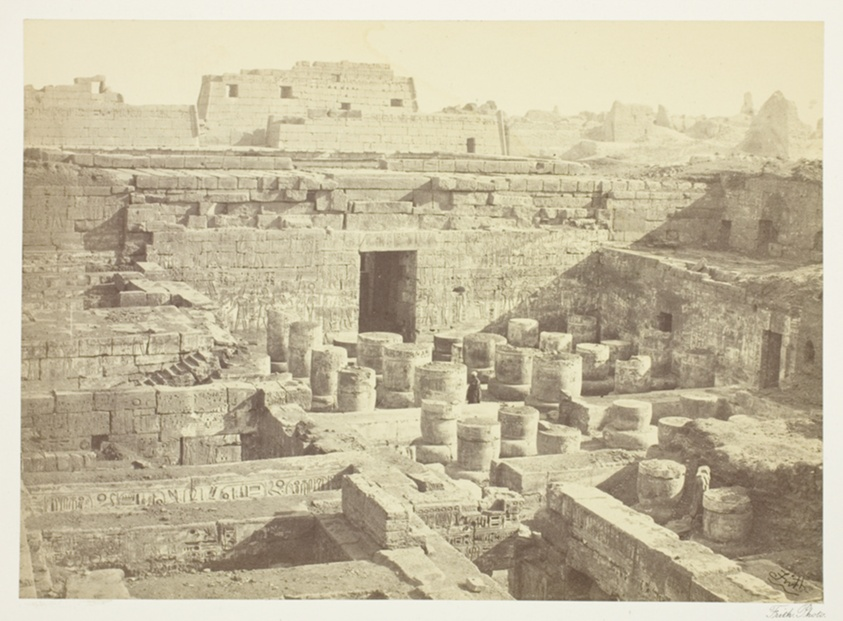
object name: Photograph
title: New Excavation at Medinet-Haboo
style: 19th century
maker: Francis Frith (English, 1822–1898)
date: 1860, printed 1862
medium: Albumen print, from the album "Egypt, Palestine and Nubia," vol. 4, (1862)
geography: England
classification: albumen silver print; photographic process; photography; photograph